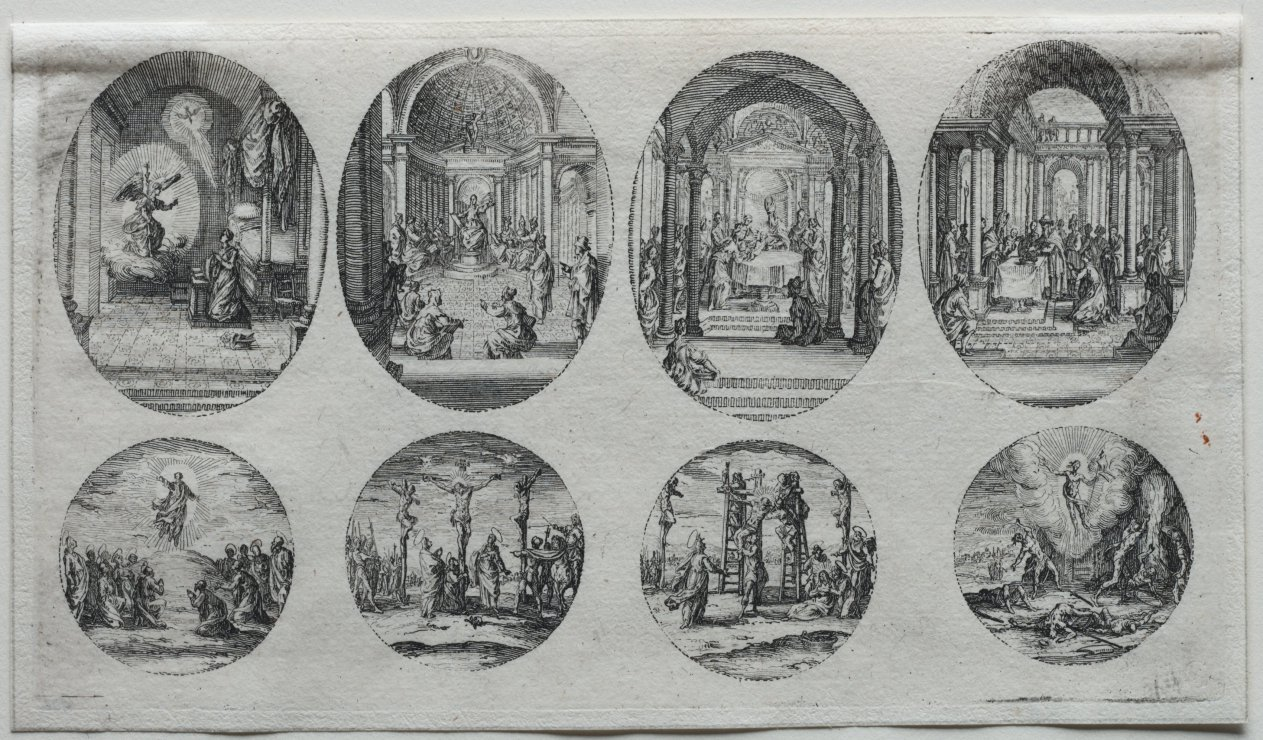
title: The Mysteries of the Passion: The Presentation in the Temple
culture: France, 17th century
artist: Jacques Callot (French, 1592–1635)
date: 1631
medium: etching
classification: Print